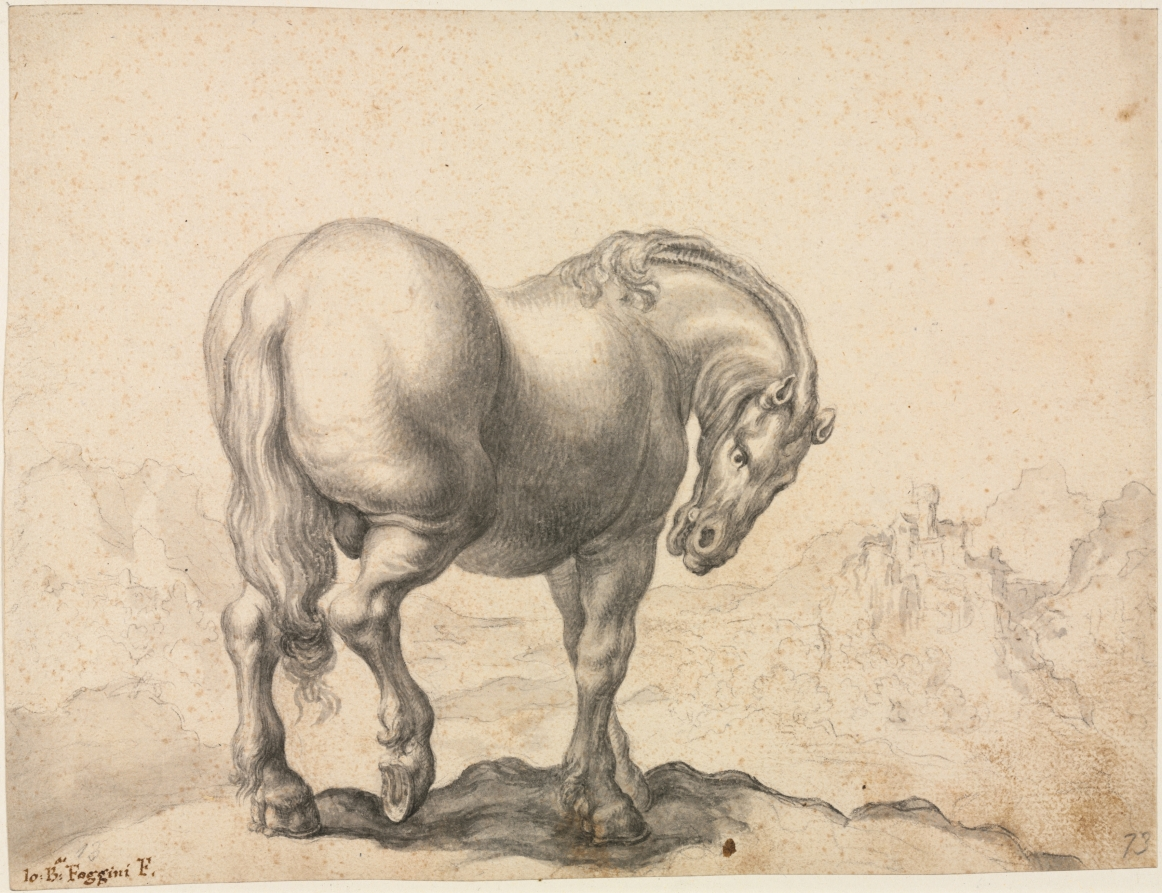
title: Study of a Stallion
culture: Italy, 18th century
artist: Giovanni Battista Foggini (Italian, 1652–1725)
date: first third 18th century?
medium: black chalk and brush and gray wash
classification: Drawing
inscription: [signed?], lower left, in brown ink: Io: Ba: Foggini F. ; lower left, in graphite: 13 ; lower right, in graphite: 73